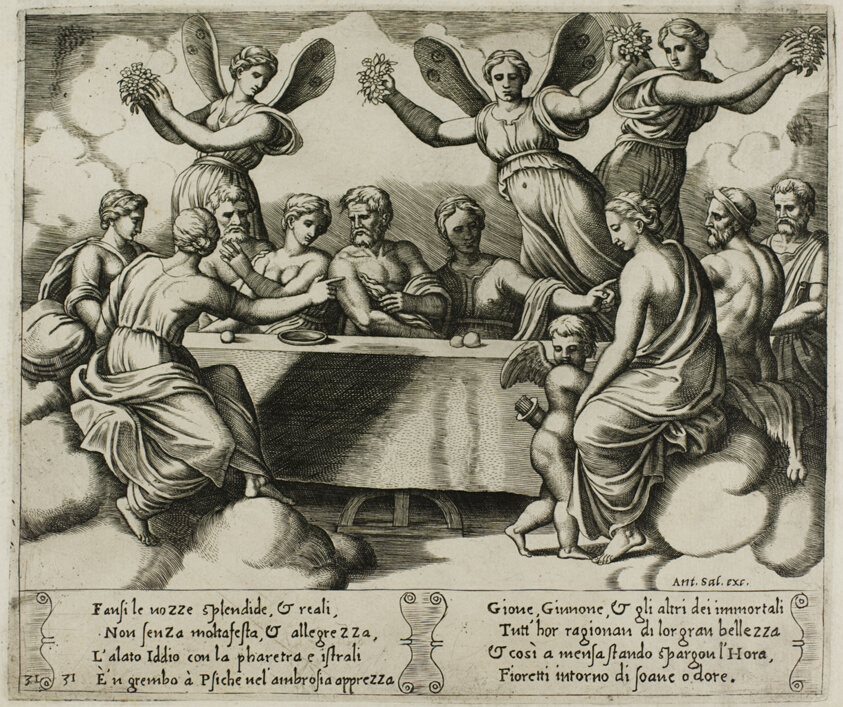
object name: Print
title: The Gods Celebrating the Wedding of Psyche and Cupid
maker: Master of the Die (Italian, active c. 1530-1560); after Michiel Coxcie I (Flemish, 1499-1592); in turn, inspired by Raffaello Sanzio, called Raphael (Italian, 1483-1520)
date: 1530/40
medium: Engraving in warm brown ink on cream laid paper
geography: Italy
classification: engraving; print; prints and drawing